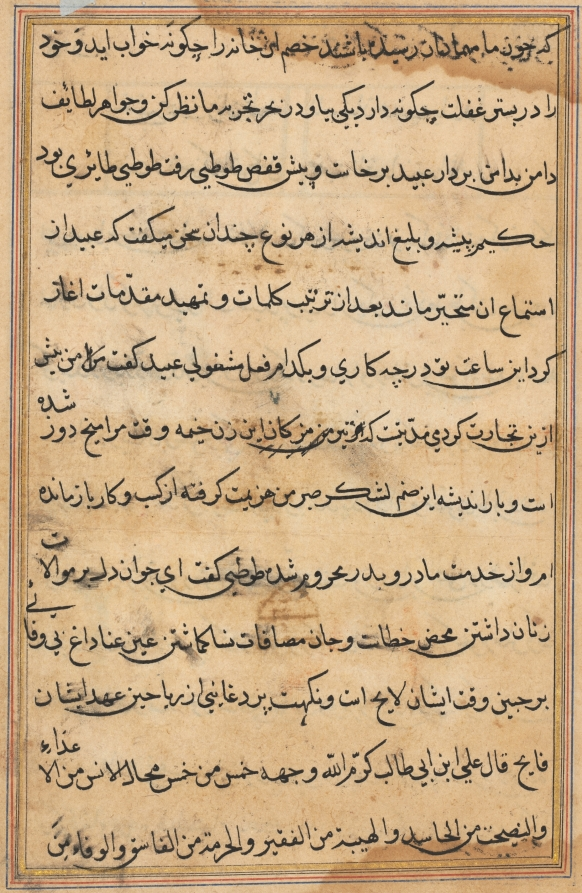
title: Page from Tales of a Parrot (Tuti-nama): text page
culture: Mughal India, court of Akbar (reigned 1556–1605)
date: c. 1560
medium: gum tempera, ink, and gold on paper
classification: Painting